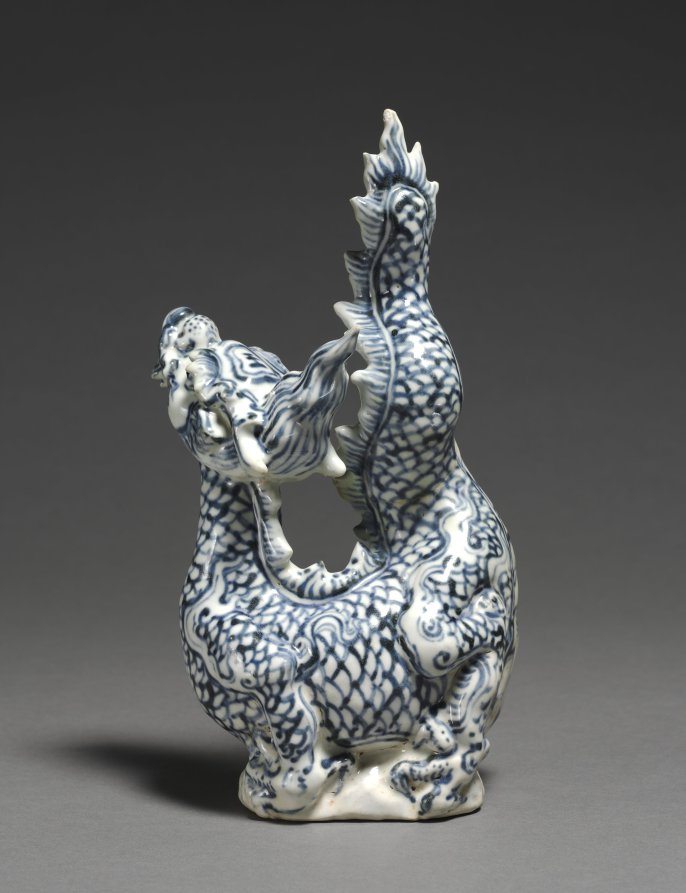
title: Ewer in the Shape of a Dragon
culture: Vietnam (Annam)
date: 1400s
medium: porcelain with underglaze blue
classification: Ceramic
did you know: This dragon-shaped vessel was tilled through a hole in the tail and emptied through the dragon's mouth.